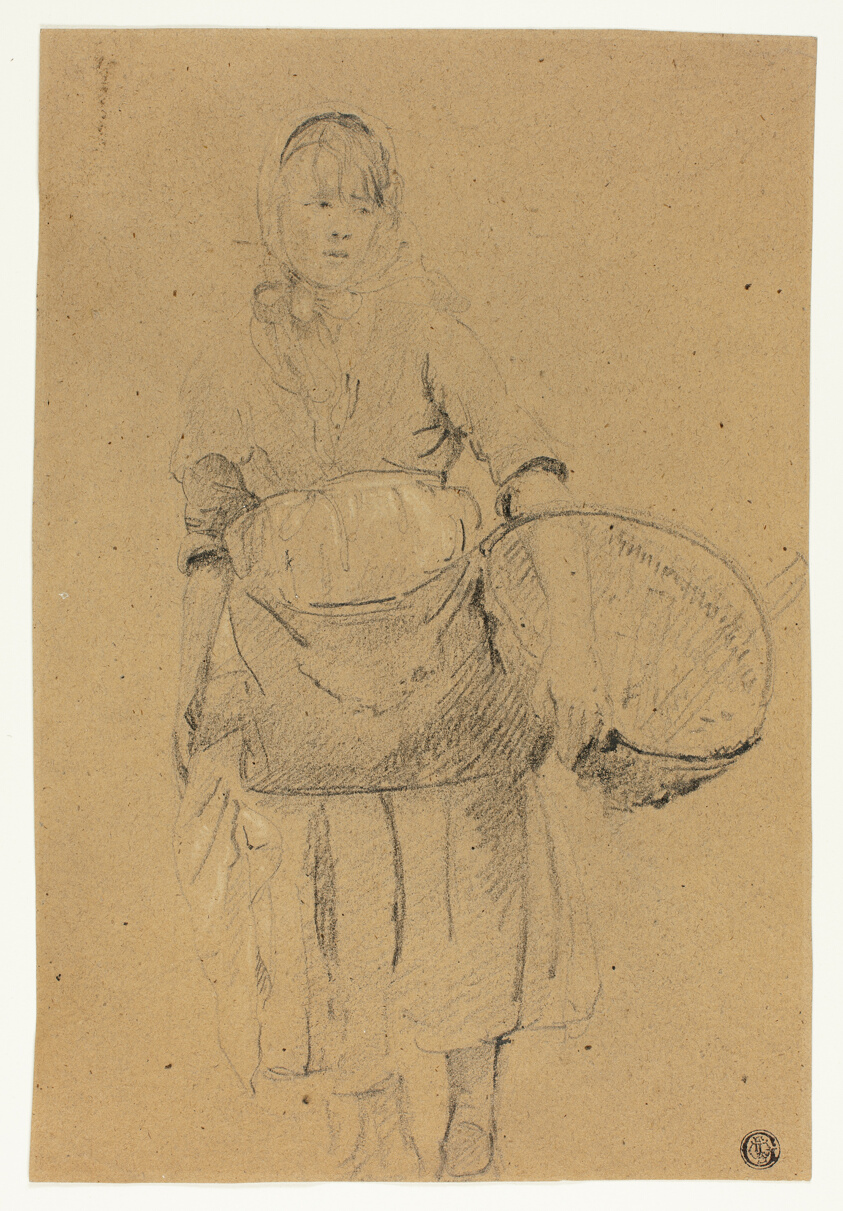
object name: Drawing and Watercolor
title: Fisher Girl with Basket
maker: Attributed to Michel François Dandré-Bardon; French, 1700-1783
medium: Black crayon with touches of white chalk on brown wove paper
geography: France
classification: chalk; drawings (visual works); prints and drawing